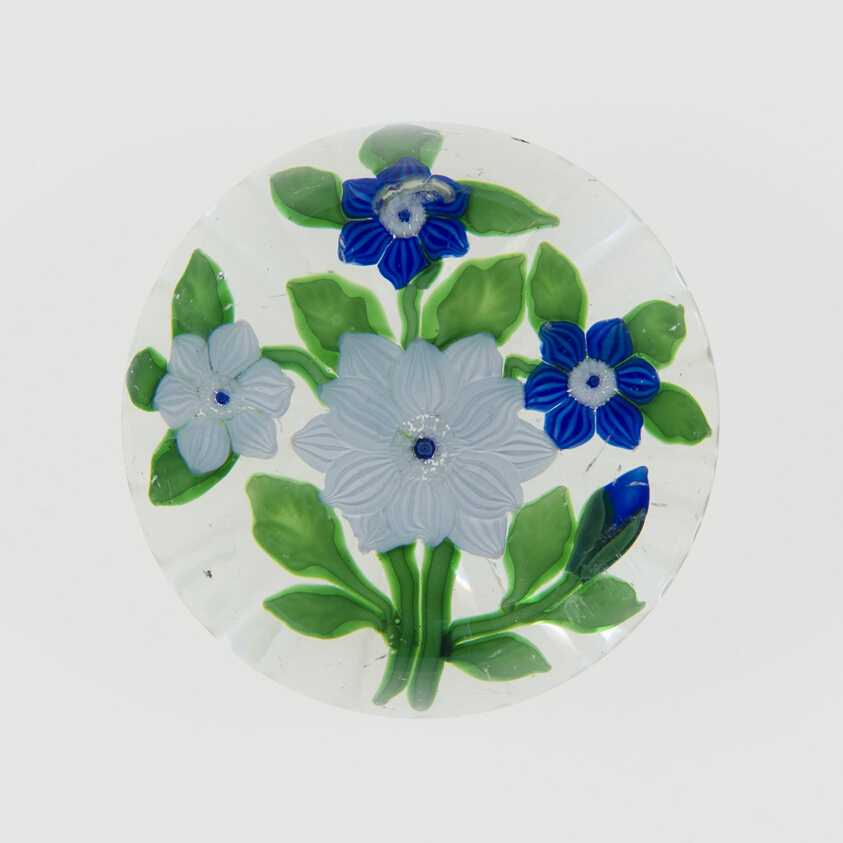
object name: Glass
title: Paperweight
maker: Baccarat Glassworks (Cristalleries de Baccarat); Lorraine, France, founded 1764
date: c. 1848–55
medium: Glass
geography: Lunéville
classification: paperweight; lampwork; european decorative arts; glass